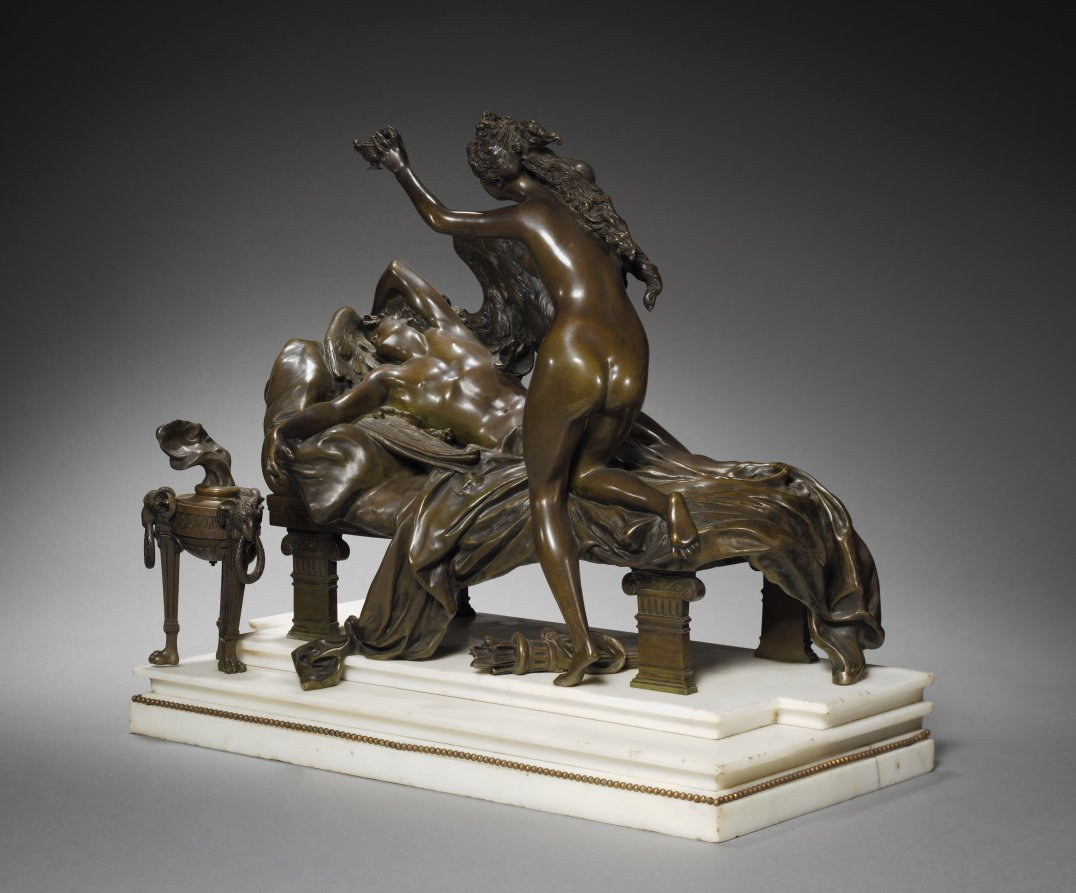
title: Cupid and Psyche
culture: France, 19th century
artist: Albert-Ernest Carrier-Belleuse (French, 1824–1887)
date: c. 1870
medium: bronze with marble base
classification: Sculpture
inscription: signed in ligature on edge of couch at head: "Carrier Belleuse."